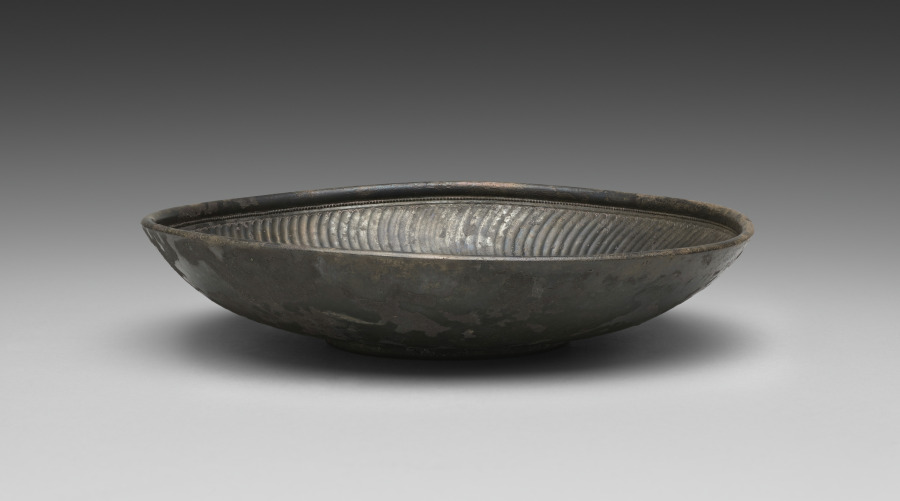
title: Bowl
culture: Roman, Imperial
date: c. 100–300 CE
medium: silver: cast and carved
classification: Metalwork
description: This large cast silver bowl features wavy fluting (sometimes called strigilation) across much of the interior, terminating in a sort of scalloped edge and finely beaded border beneath the rim. Within the central medallion are a miniature oblong shell-like object and the punched inscription VERISS (perhaps a name), both slightly off-center. The combination of wavy fluting, scalloped edges, and a shell-like object may allude to the sea, or to the liquid contents this bowl may once have contained.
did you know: This solid silver bowl weighs nearly one kilogram, more than two pounds.